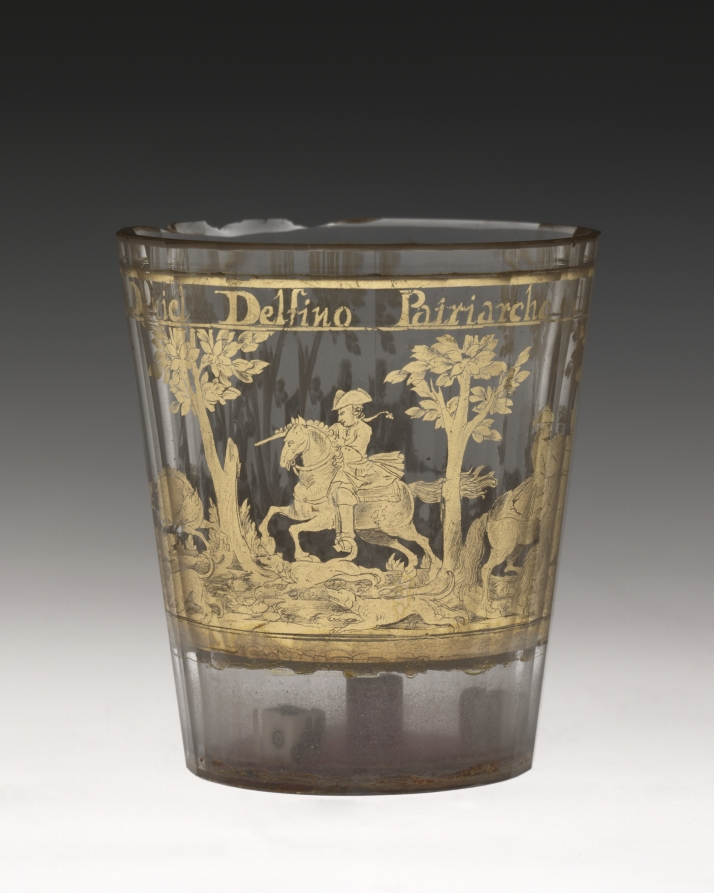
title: Tumbler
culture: Bohemia, 18th century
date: c. 1730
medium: zwischengoldglas (glass)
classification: Glass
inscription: in gold, around rim of glass: Monsigr. Daniel Delfino Patriarcha di Aguilleid